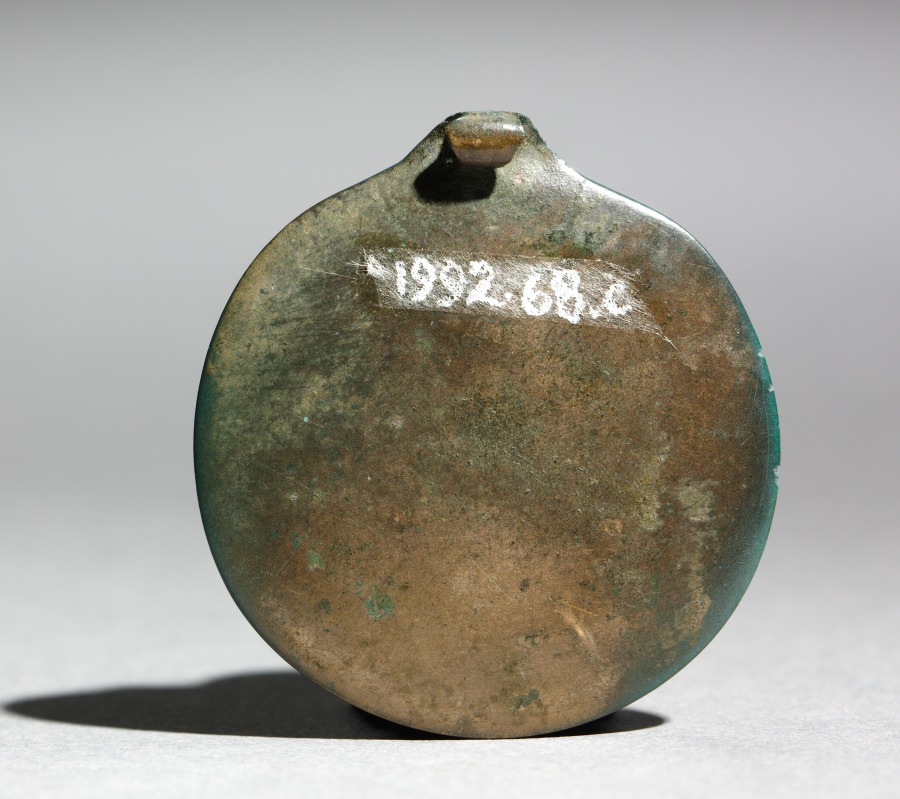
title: Elements from a Necklace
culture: possibly Hungary, Bronze Age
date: 1300s BCE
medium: bronze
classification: Jewelry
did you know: The cast bronze necklace pendants are partially oxidized, revealing a green patina.